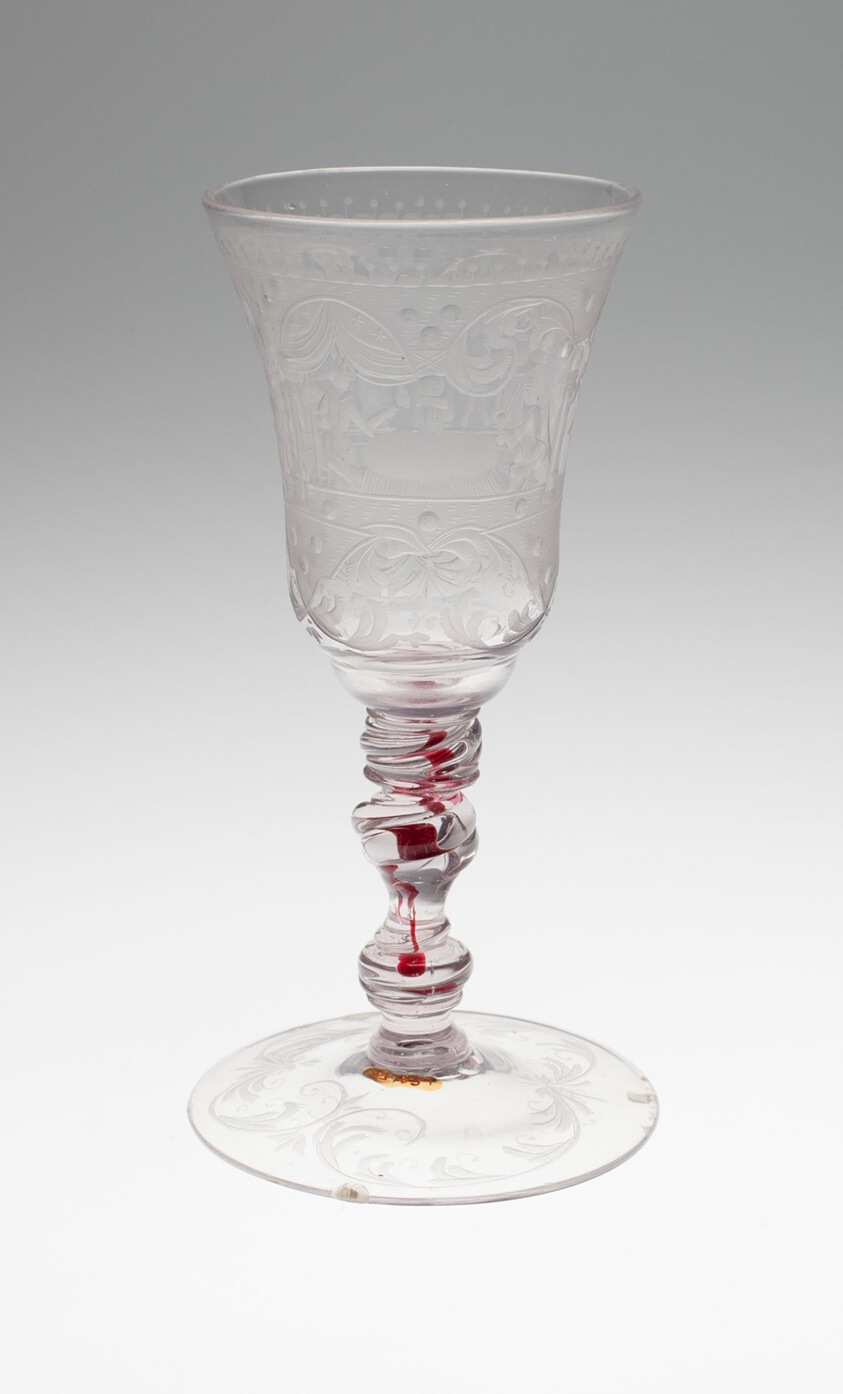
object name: Glass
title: Wine Glass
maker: Bohemia, Czech Republic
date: c. 1730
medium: Glass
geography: Bohemia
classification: drinking vessel; glass; european decorative arts